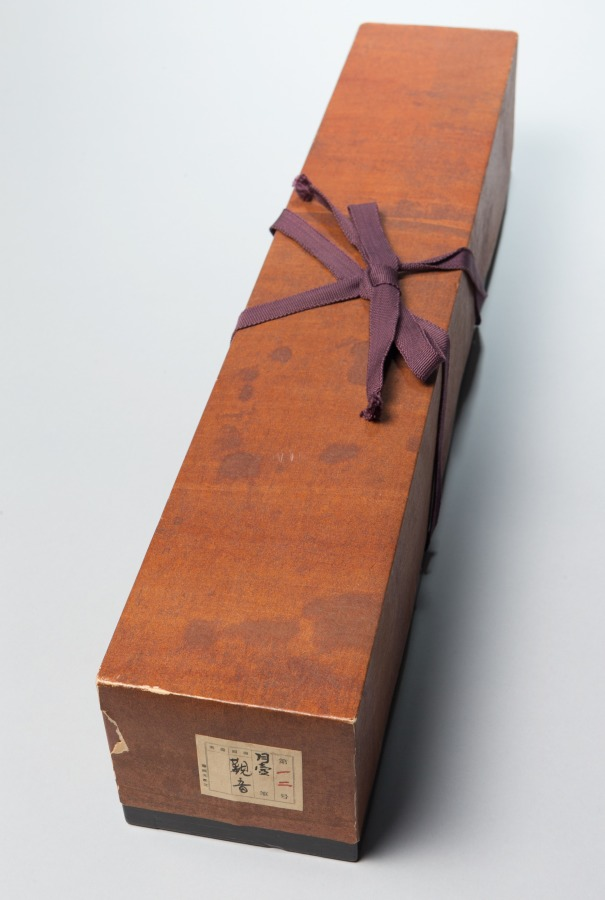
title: White-Robed Guanyin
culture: China, Southern Song dynasty (1127-1279)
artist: attributed to Zhang Yuehu (Chinese, active 1200s)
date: late 1200s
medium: Hanging scroll; ink on paper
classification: Painting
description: The figure here sits on a rocky elevation representing Potalaka in the Southern Sea, Avalokitesvara’s island home. A vase with a bamboo sprig holds pure water, the nectar of life. Bamboo shines through the figure’s halo, a way of seeing the illusionary world through the Buddhist truth. Avalokitesvara (Guanyin in Chinese), the bodhisattva of compassion, was integrated into the Chan Buddhist canon of venerated beings. In this context, the bodhisattva is often depicted in its female manifestation as the White-Robed Guanyin. The worship of the feminine White-Robed Guanyin has its origins on Mount Tianzhu in Hangzhou, where Qian Liu (852–932), ruler of the Wuyue kingdom, established the Upper Tianzhu Monastery to venerate her image.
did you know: As an artist, Zhang Yuehu was better known in Japan than in his own country.